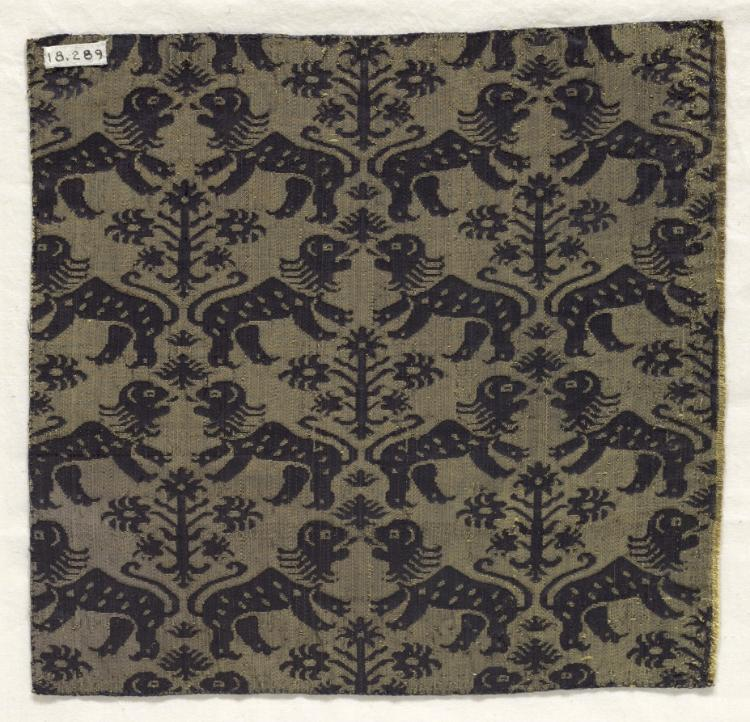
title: Fragment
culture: Spain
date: 1500s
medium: silk damask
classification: Textile